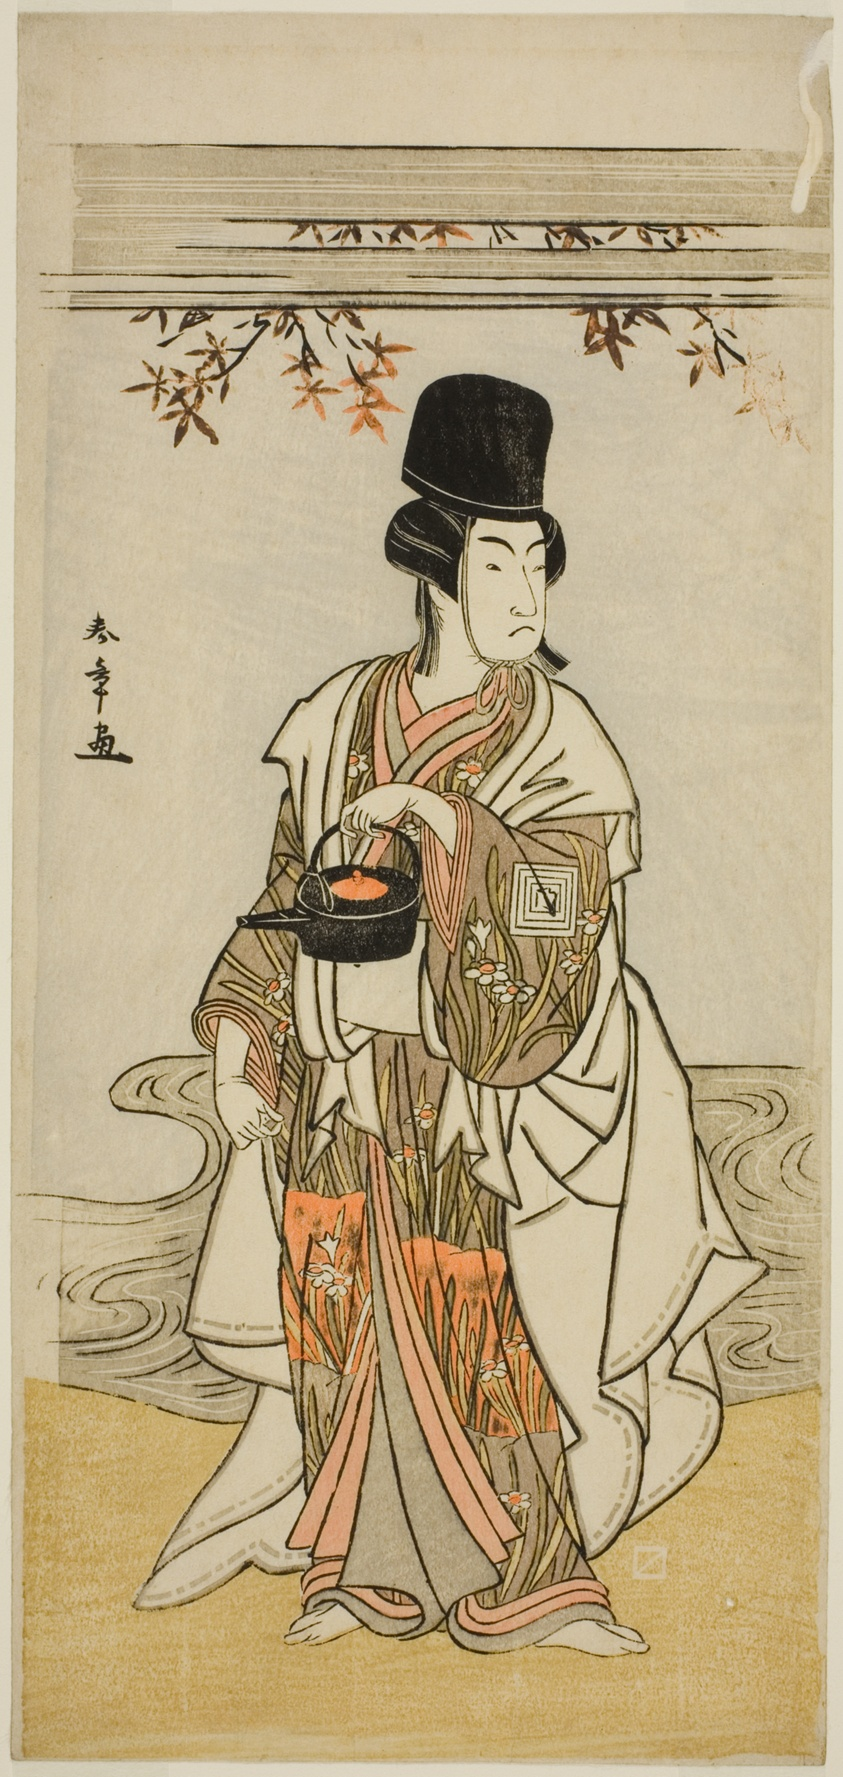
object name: Print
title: The Actor Ichikawa Monnosuke II as the Court Servant Shoheida Sadamori in the Play Masakado Kammuri no Hatsuyuki, Performed at the Nakamura Theater in the Eleventh Month, 1777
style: Japanese (culture or style)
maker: Katsukawa Shunsho 勝川 春章; Japanese, 1726-1792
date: c. 1777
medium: Color woodblock print; hosoban; second-from-right sheet in a four-sheet print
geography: Japan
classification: woodblock print; print; asian art